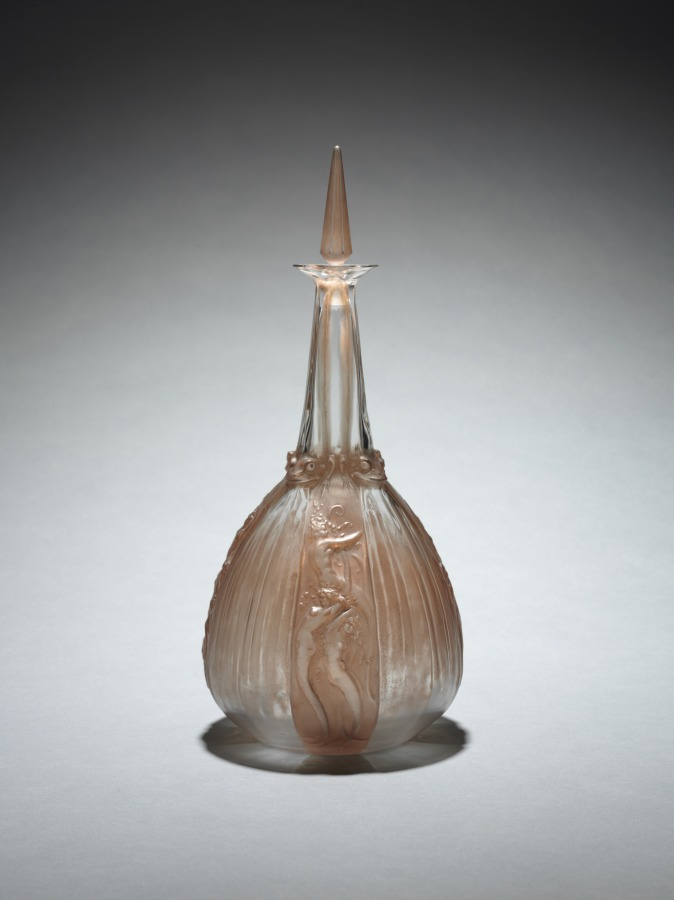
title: Mermaids and Frogs Decanter (Carafe sirènes et grenouilles)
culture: France, 20th century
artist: René Lalique (French, 1860–1945)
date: 1917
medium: glass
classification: Glass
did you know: The title of this work translates to mermaids and frogs carafe.